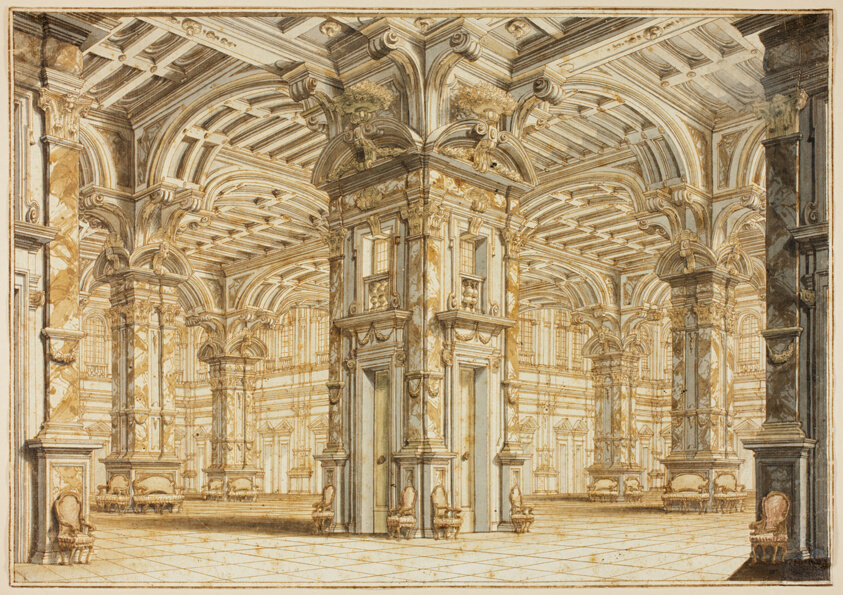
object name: Drawing and Watercolor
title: Festival Hall From a Theatrical Scene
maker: Attributed to Giuseppe Galli-Bibiena; Italian, 1696-1757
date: c. 1719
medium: Pen and brown ink, with brush and brown, gray, yellow, and pale green wash and touches of red wash, on cream laid paper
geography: Italy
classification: drawings (visual works); prints and drawing